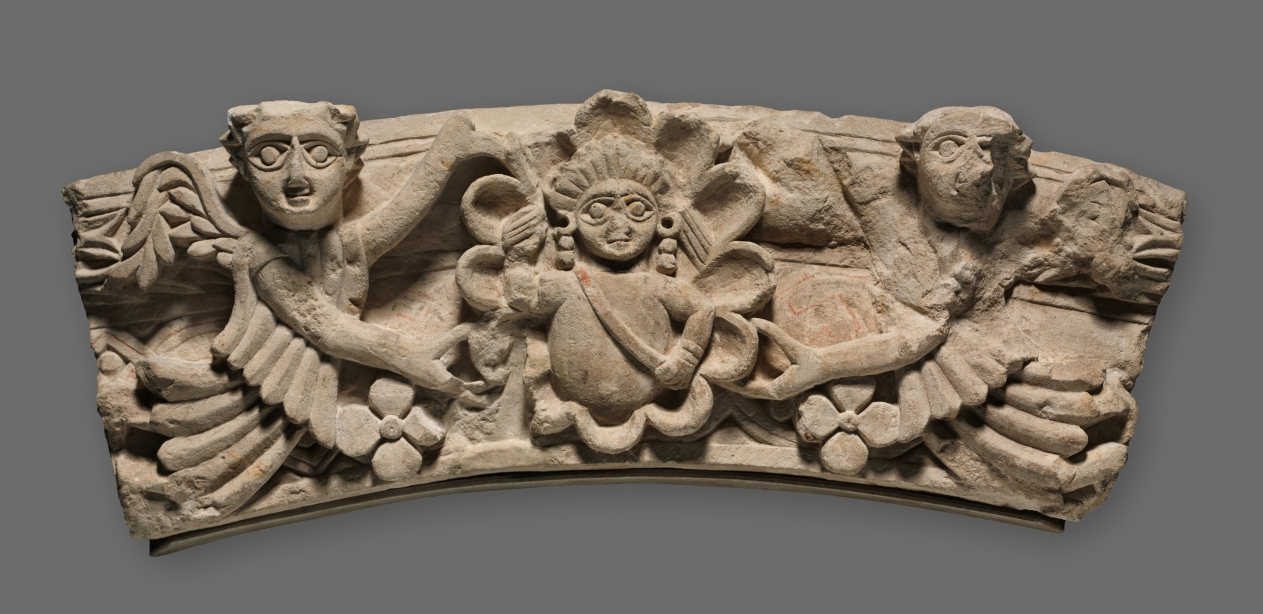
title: Keystone of an Arch: Female Bust within a Medallion Supported by Angels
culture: Egypt, Coptic period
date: 400s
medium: limestone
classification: Sculpture